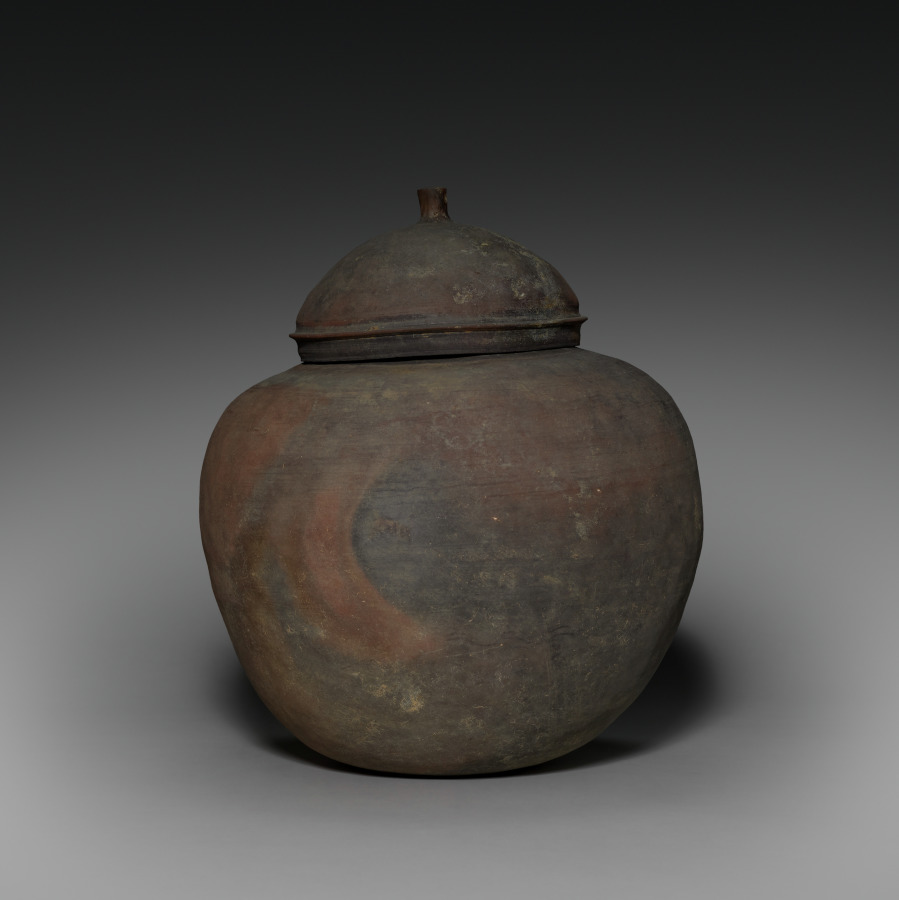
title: Vessel with Knobbed Lid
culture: Korea, Unified Silla period (676-935)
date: 676–935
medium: stoneware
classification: Ceramic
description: This storage vessel is distinguished by its robust, subtly proportioned form and its body color. The purplish-brown surface "skin" is enlivened by a series of smoky black swirling marks that occurred during the firing in the wood kiln. This shape began as a series of clay coils that were pinched and then paddled; however, it spent more time on a potter's wheel to thin and finish its outer surface. The lid received similar, understated attention to detailing and finish.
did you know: This type of lidded vessel served to contain cremated remains, indicating the popularity of Buddhist mortuary practice in Korea during the Three Kingdoms period.